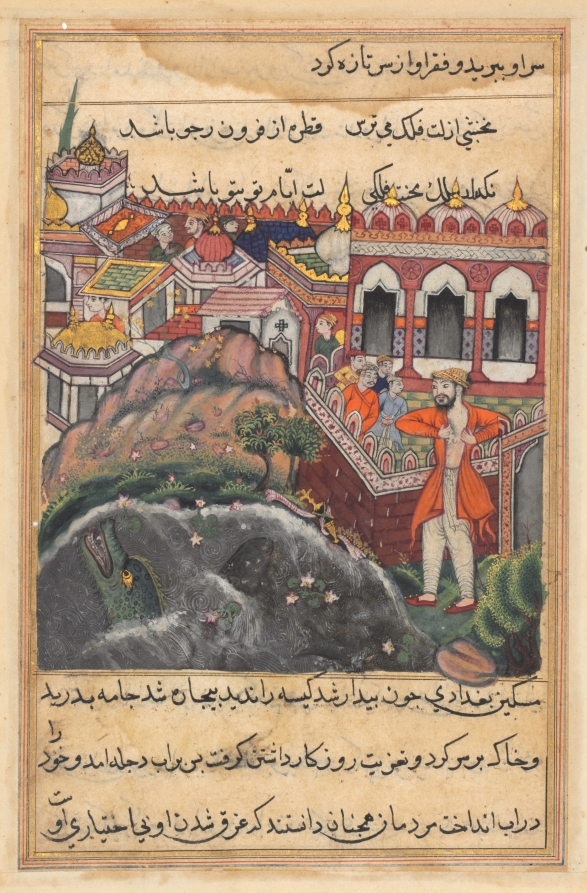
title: The bag of gold which he received for the slave girl being stolen in a mosque, the young man of Baghdad tears his cloths and is about to fling himself into the Tigris, from a Tuti-nama (Tales of a Parrot): Forty-eighth Night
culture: Mughal India, court of Akbar (reigned 1556–1605)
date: c. 1560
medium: gum tempera, ink, and gold on paper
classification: Painting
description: In the foreground, the distraught young man stands at the edge of the rushing river. Desperate for money, he has sold his lover, a slave girl, but finds himself destitute again. A group of onlookers watch the distressed man from the courtyard in front of the mosque. They will jump into the water to save him before he can drown.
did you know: Gigantic fish and a crocodile lurk in the swirling waters of the Tigris.